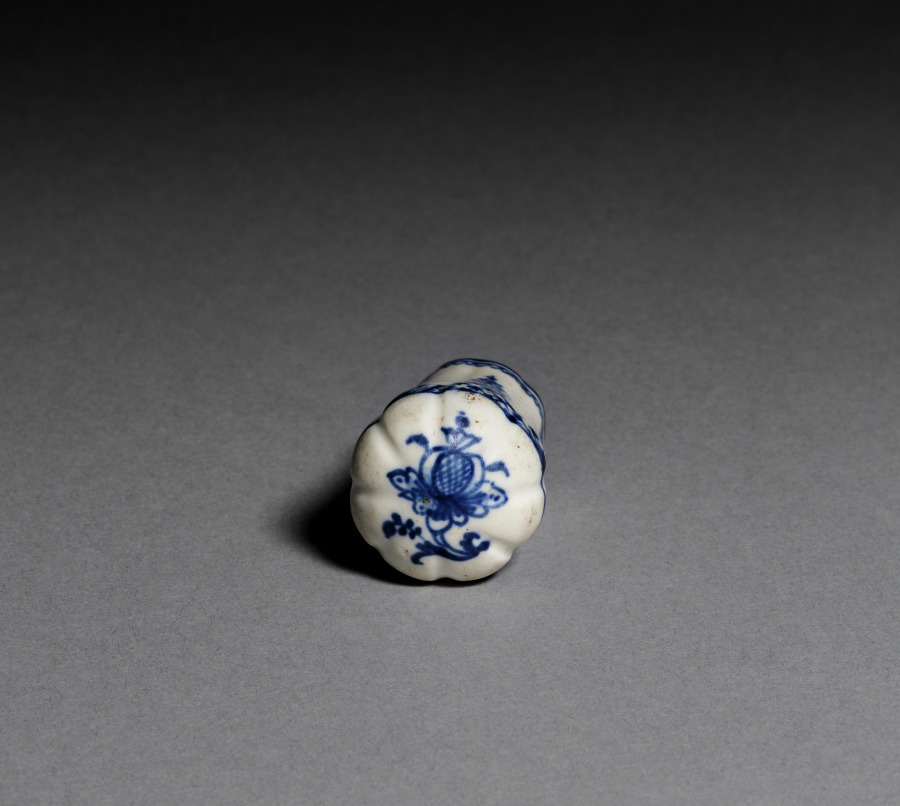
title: Cane Handle (Poignée de canne)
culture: France, Saint Cloud, early 18th Century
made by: Saint Cloud Porcelain Factory (French)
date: c.1700–1720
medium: soft-paste porcelain with underglaze blue decoration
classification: Ceramic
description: With its ribbing and underglaze blue decoration in the form of draping blue garlands, this porcelain handle was likely among the first to have been produced at the Saint-Cloud Porcelain Factory. Though Saint-Cloud may have been the first to produce porcelain cane handles as fashionable accessories, their popularity meant that they were soon produced at a variety of other French factories during the first half of the 1700s.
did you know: Canes, or sticks, were popular fashion accessories for aristocratic men, women, and children in 18th-century France.